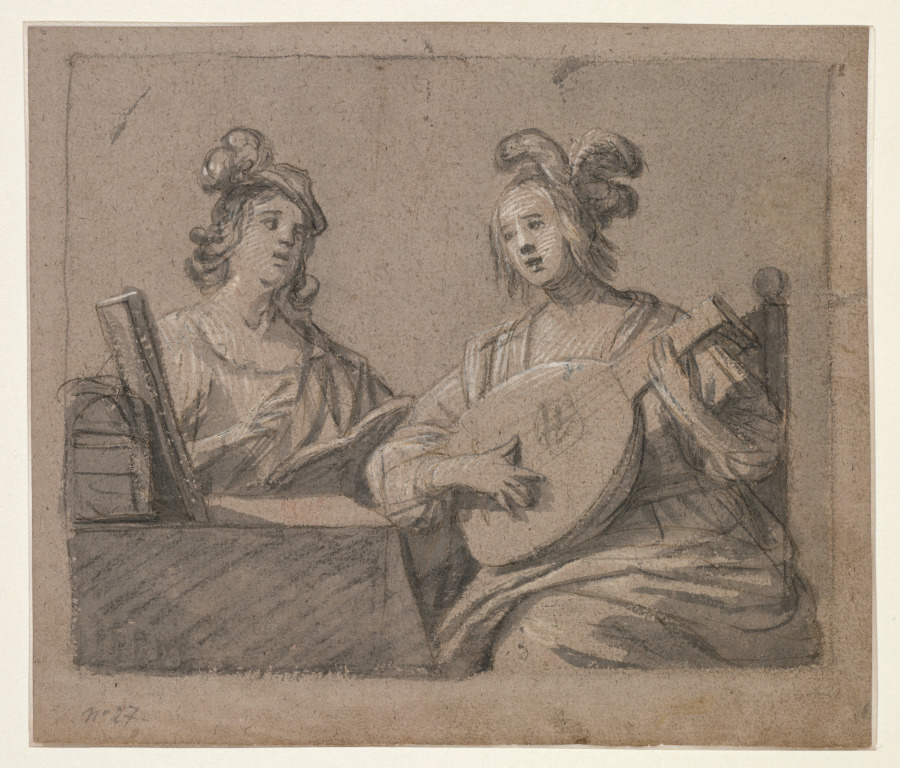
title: Musical Scene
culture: Netherlands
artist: Gerrit van Honthorst (Dutch, 1590–1656)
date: 1625–55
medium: black ink wash over pen and brown ink and black chalk over graphite on gray-brown paper with white heightening, incised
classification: Drawing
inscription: inscribed “no 27” in black chalk, lower right on antique laid tan textured paper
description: The Utrecht artist Gerrit van Honthorst was internationally known as a portrait painter, but he also gained a reputation as a painter of raucous musical scenes and parties. This drawing was once part of an album of compositional types that the artist showed to prospective patrons. Though the cheerful theme of a man and a woman sharing a song seems innocent, such unions often had amorous or lascivious connotations in 17th-century Holland.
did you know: In 17th-century Holland, scenes of men and women playing music together often had amorous connotations.